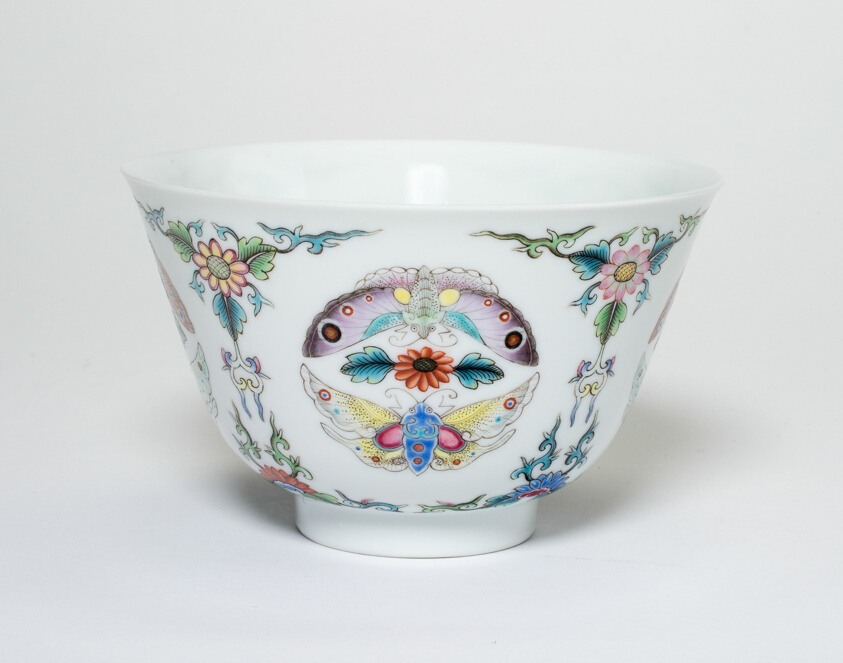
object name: Vessel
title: Cup with Floral Scrolls and Moths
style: Chinese (culture or style)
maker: China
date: Qing dynasty (1644–1911), Qianlong reign mark and period (1736–1795), late 18th century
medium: Porcelain painted in overglaze famille rose enamels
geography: China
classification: drinking vessel; porcelain; asian art; ceramics; vessel